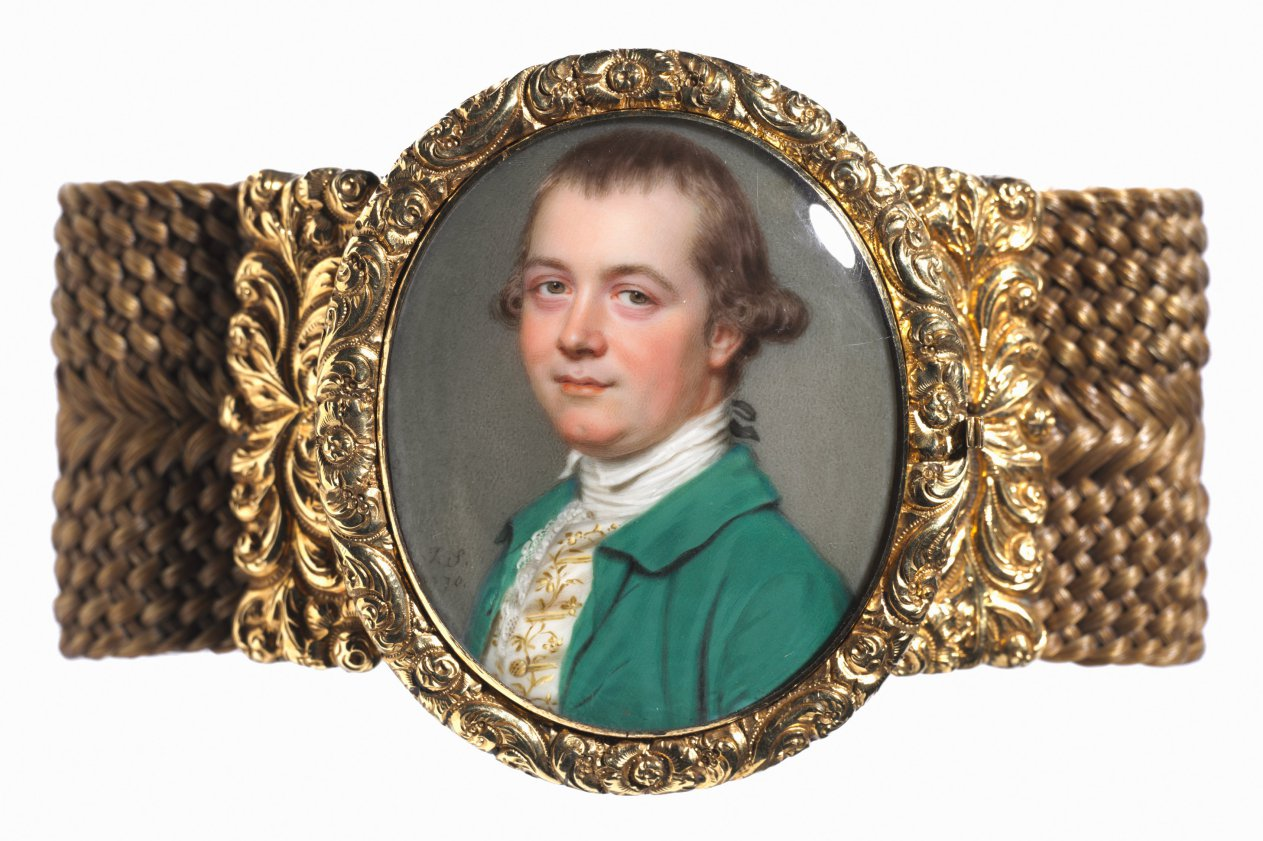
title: Portrait of Constantine Phipps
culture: England, 18th century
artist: John I Smart (British, 1741–1811)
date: 1770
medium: watercolor on ivory in a later gold and woven hair bracelet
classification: Portrait Miniature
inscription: signed lower left: J.S. / 1770.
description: John Smart painted the British gentleman Constantine Phipps (1746–1797) at the age of twenty-four, executing this portrait in 1770, the year following the death of the sitter’s father, Constantine Phipps (1710?–1769), and preceding his marriage to Elizabeth Tierney (d. 1832). Phipps the younger was the second son of a landowner and lived throughout England and France. In 1788 he moved his family to Caen, Normandy, hoping to educate his ten (eventually thirteen) children more economically. Phipps and his wife returned to England in 1792 to attend their daughter’s wedding. The escalating conflict between France and England prevented Phipps from returning to France where he had left eight children behind. Unfortunately, he did not see them before his death five years later. The portrait represents Phipps’s nearly full face. He has light brown eyes and natural brown hair worn en queue. He wears a green coat with a small collar, a white waistcoat embroidered with gold, and a high, white stock collar. Phipps is depicted against an olive-gray background. This early work by Smart already exhibits hallmarks of the artist’s style, such as the plain, gray background, the sitter’s colorful clothing, and his expressive eyes and slightly upturned mouth, which suggest that Phipps was a self-assured man with a sense of humor. The small format is also characteristic of the first decade of Smart’s career. This miniature is mounted in an elaborately carved gold frame on a bracelet made of gold and woven light brown human hair. The bracelet was executed later than the miniature and is in the style of the 1830s or 1840s. The inscription on the clasp reads “E. C. E. T. / Nov.r 29th 1838, aged 7” and may indicate that this bracelet was given to Constantine’s great-granddaughter Elizabeth Clarissa Emilie Toker (1831–1888) on her seventh birthday possibly by her mother or grandmother. There is a variant of this work in the Phipps collection in London. Painted in 1771, this miniature descended from Colonel Pownoll Phipps, the seventh child of Constantine Phipps, to John Constantine Phipps.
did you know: This miniature is mounted to a bracelet that was made at least 50 years later.